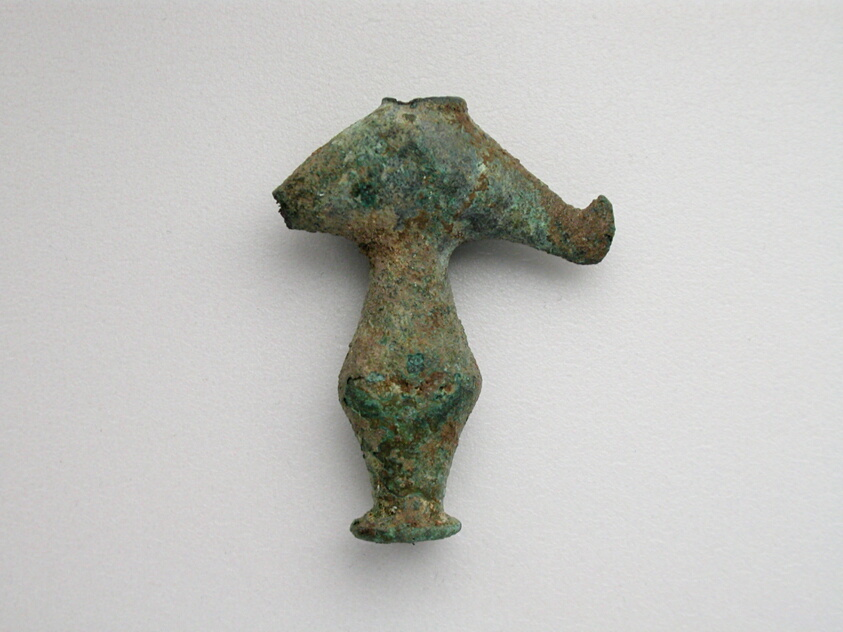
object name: Costume and Accessories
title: Biconical Bead with Bird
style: geometric, ancient, greek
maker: Greek; Thessaly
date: Geometric Period (800–700 BCE)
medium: Bronze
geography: Greece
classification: votive offering; ex-voto; bead; costume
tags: bird